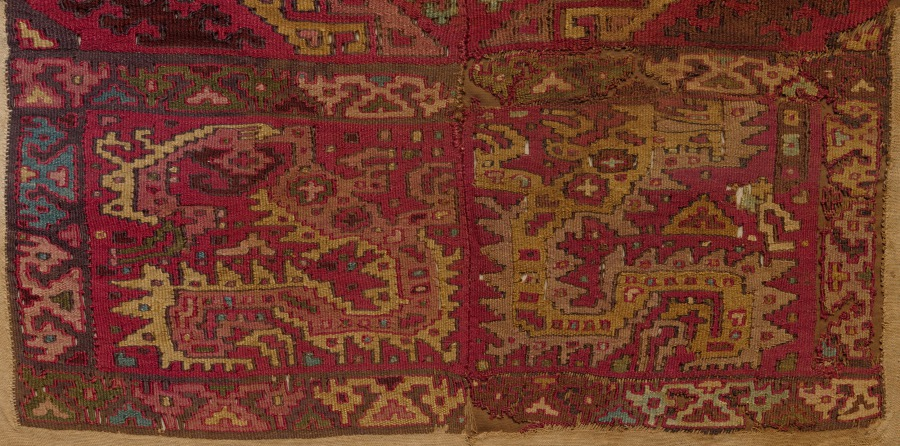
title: Tapestry-woven Yoke from a Tunic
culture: Central Andes, North Central Coast, Moche-Wari Style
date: 800–1200?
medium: camelid fiber and cotton, tapestry weave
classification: Textile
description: This fragment comes from the upper area of a tunic, with thick embroidery defining remnants of the neck opening. In the rectangular area on the chest are two similar long-tailed creatures rendered in a highly geometric style. Each is rotated 90 degrees, so their tails are parallel to the bottom edge. The cloven hooves on their upper legs may identify the creatures as deer or Andean camelids, such as llamas or alpacas.